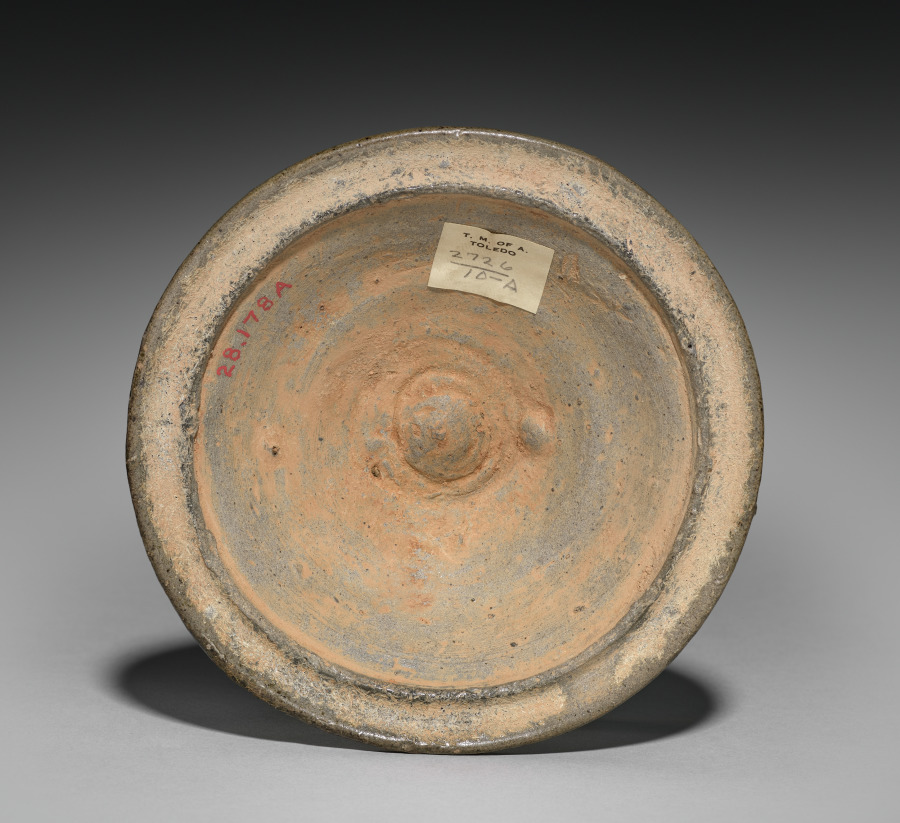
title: Burial Urn with Stamped Design (lid)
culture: Korea, Unified Silla period (676-935)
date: 500s–600s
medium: stoneware with stamped designs under olive-green glaze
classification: Ceramic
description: After the introduction of Buddhism, cremation became a common practice in Korea. This jar, which once contained the remains of the dead, may have nested in a larger stone container. The repetitive patterns that appear on the lid and the container was done with a stamping technique.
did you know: Containing the remains of the dead, this type of ancient clay pottery was excavated from tombs.